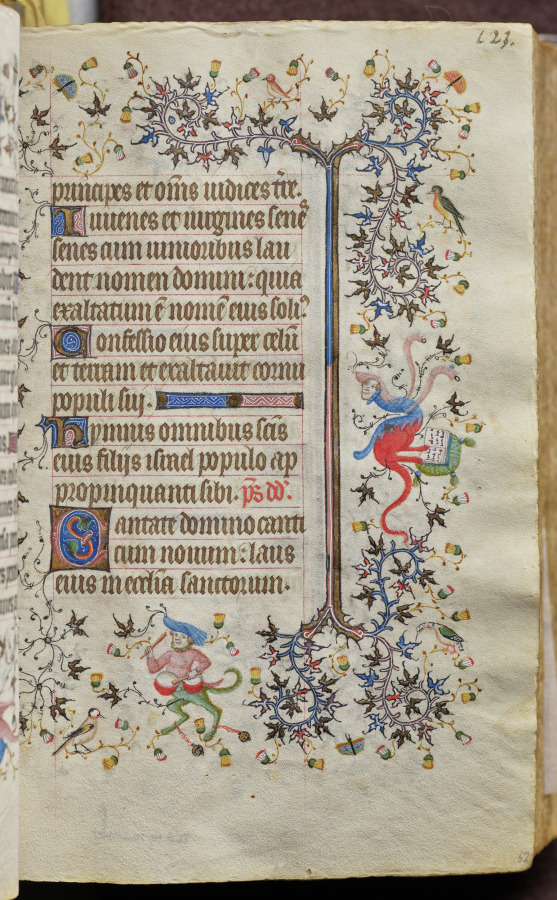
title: Hours of Charles the Noble, King of Navarre (1361-1425): fol. 62r, Text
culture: France, Paris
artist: Master of the Brussels Initials and Associates (French)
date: c. 1405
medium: ink, tempera, and gold on vellum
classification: Bound Volume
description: This precious volume was obviously highly prized by its owner, the French-born King of Navarre, who had his coat of arms painted on no less than twenty folios. Rather than directly commissioning this manuscript from a specific workshop, it seems that Charles the Noble acquired his book of hours -- perhaps ready-made for the luxury market -- while on a trip to Paris in 1404-05. A collaborative effort, six painting styles are evidenced within the pages of this codex, those of two Italians, two Frenchmen, and two Netherlanders. The painter who was responsible for the planning and decoration of the book, and who produced seventeen of the large miniatures, was a Bolognese artist known as the Master of the Brussels Initials. His principal assistant, responsible for most of the borders, was a Florentine who signed his name "Zecho" da Firenze on folio 208 verso.